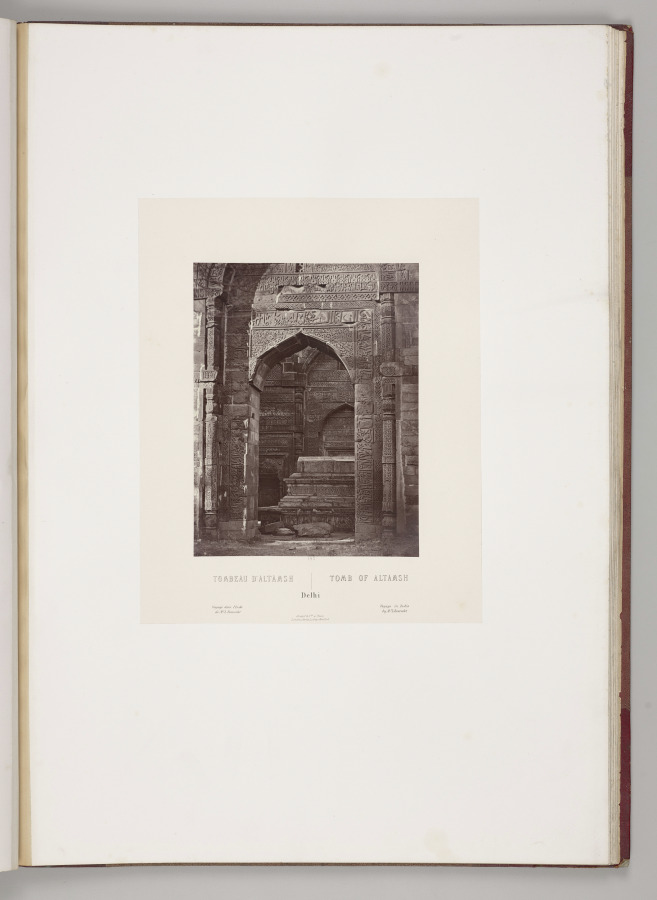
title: Tomb of Altamsh, Delhi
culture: France, 19th century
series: India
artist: Louis-Théophile Marie Rousselet (French, 1845–1929)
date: 1865–68, published 1869–70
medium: Albumen print from glass plate negative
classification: Photograph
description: Concerned that his drawings did not do justice to the splendor of India’s monuments, Rousselet learned photography in India that year, a remarkable accomplishment. He proved to be a talented photographer with a sophisticated sense of composition. The scenes in this volume sweep across sites of Sultanate, Rajput, and Mughal power in northern India, from the sacred Hindu city of Varanasi on the Ganges River to Alwar in Rajasthan. Also included are several scenes of industry and portraits of Indian rulers.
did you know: Louis Rousselet described himself as a “scientific traveler” when he went to India alone at age 18 in 1863 and stayed into 1868.